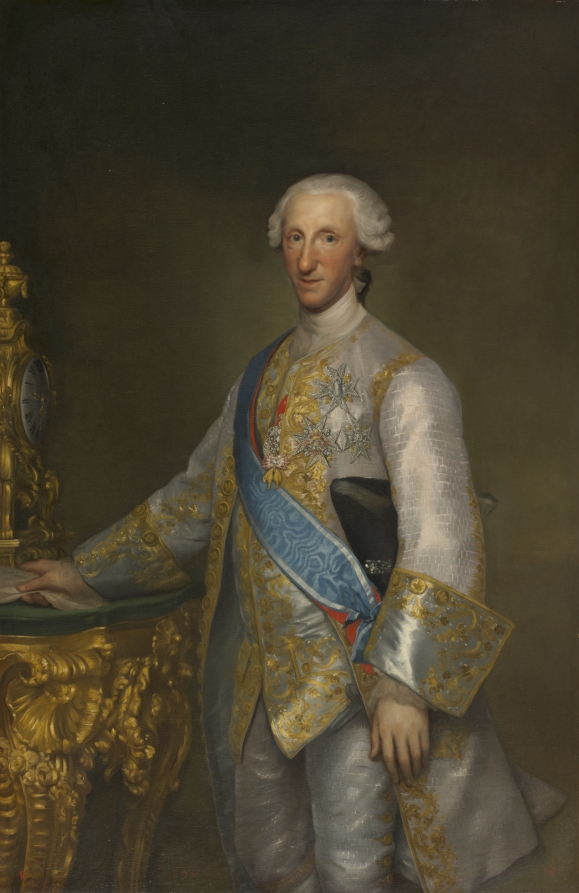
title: Portrait of Infante Don Luis de Borbon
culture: Germany, 18th century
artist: Anton Raphael Mengs (German, 1728–1779)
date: c. 1776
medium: oil on canvas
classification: Painting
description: As a younger child of King Philip V of Spain, Don Luis received important religious posts, including Archbishop of Toledo and Seville. However, his philandering led to losing these titles and banishment from the court, while he became a crucial avant-garde art patron, especially of Goya. The encrustations of medals and cacophonous fabrics speak to Mengs's experiments in representing status, privilege, and royal honors in the age of Enlightenment, when rational skepticism began to confront absolutist, hereditary power.